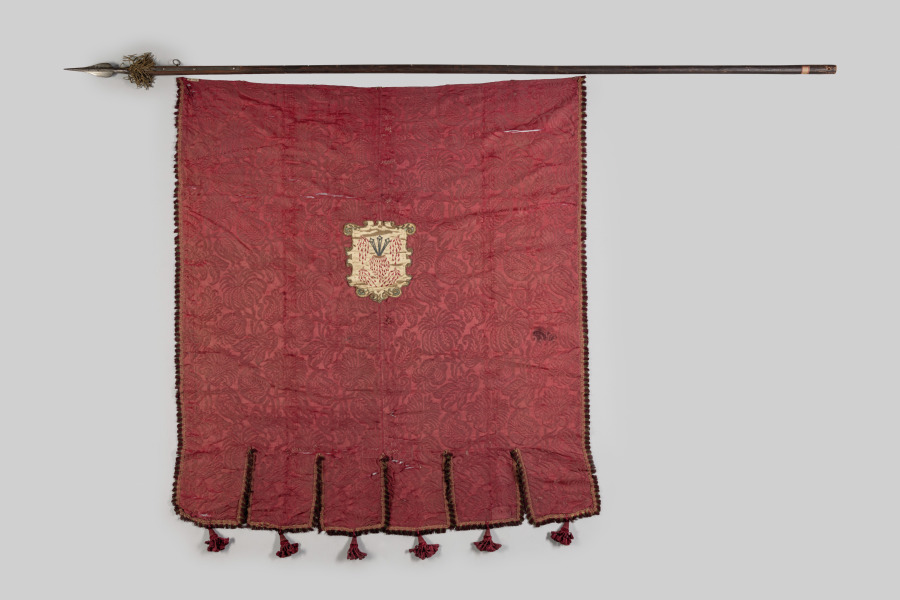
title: Banner with Medallions of Christ's Passion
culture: Spain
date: 1700s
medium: crimson silk brocade; satin; scalloped border with fringe and tassels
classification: Textile